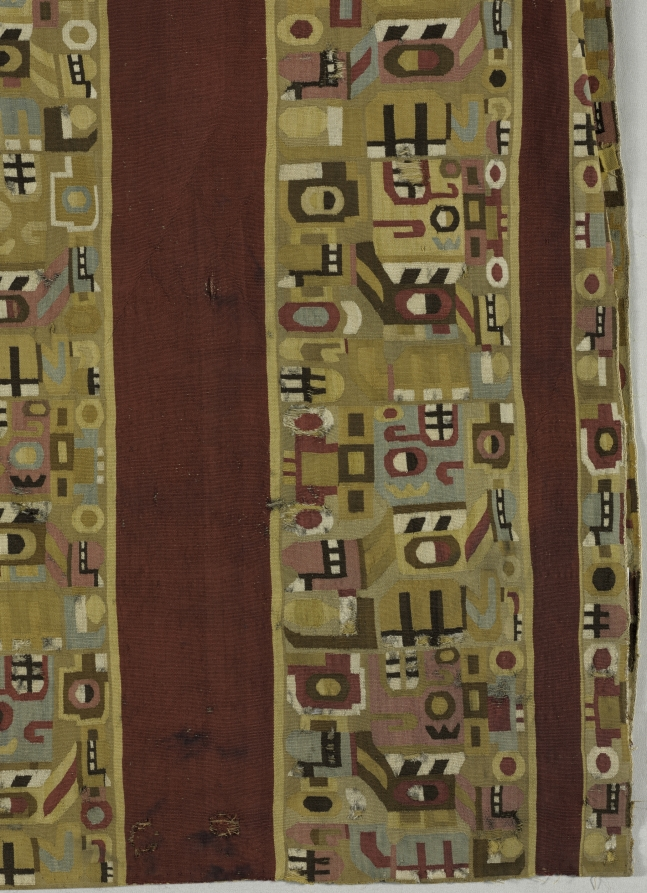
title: Tunic with Sacrificer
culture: South America, Peru, Central Andes, Middle Horizon, Wari people, 7th-11th century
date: 600–1000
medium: camelid-fiber, cotton; tapestry weave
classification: Textile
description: An extremely abstract supernatural sacrifice repeats in different colors and orientations across the body of this tunic, which was shortened on one side in antiquity. Look for the toothy black-and-white mouth in the sacrificer's upward-gazing head; other facial features include a button nose and a vertically divided eye. The figure holds the L-shaped haft of an axe behind its back and, at the front of its body, a short staff with a severed, upside-down human head on the top.